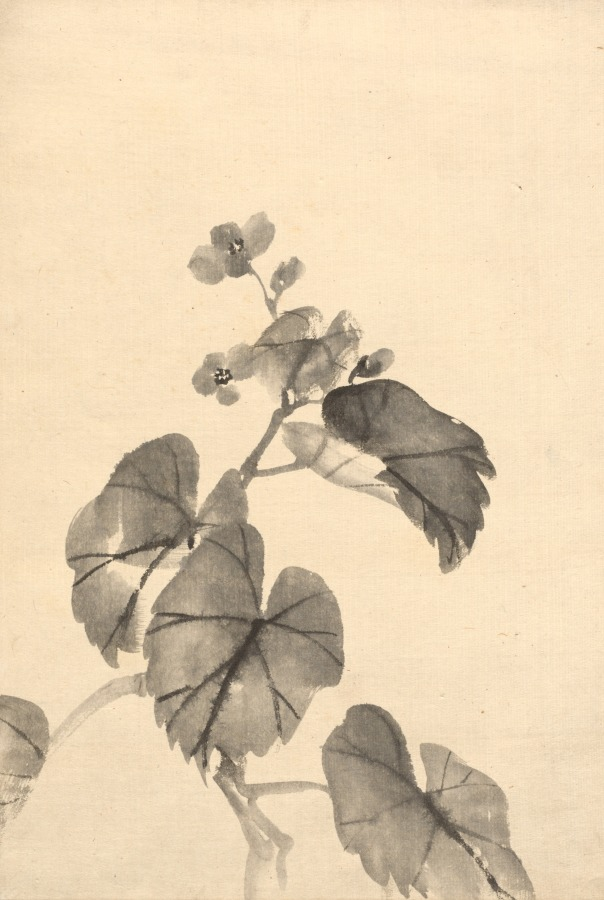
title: Branch of Begonia in Bloom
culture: Japan, Meiji period (1868–1912)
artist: attributed to Kono Bairei (Japanese, 1844–1895)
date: c. 1880–95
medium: ink on paper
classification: Drawing